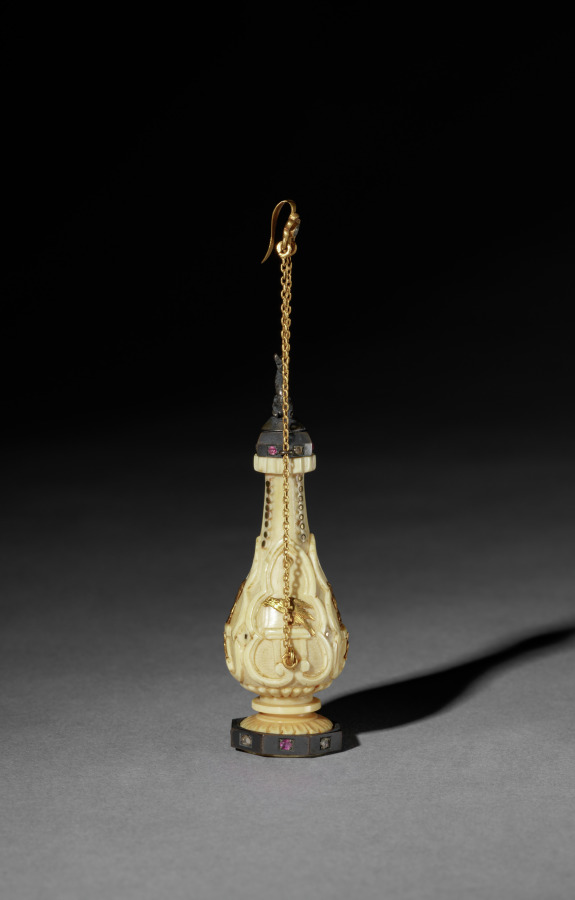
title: Scent Bottle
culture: Continental, mid-19th century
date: mid-1800s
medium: ivory with gold and silver mounts set with jewels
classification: Miscellaneous